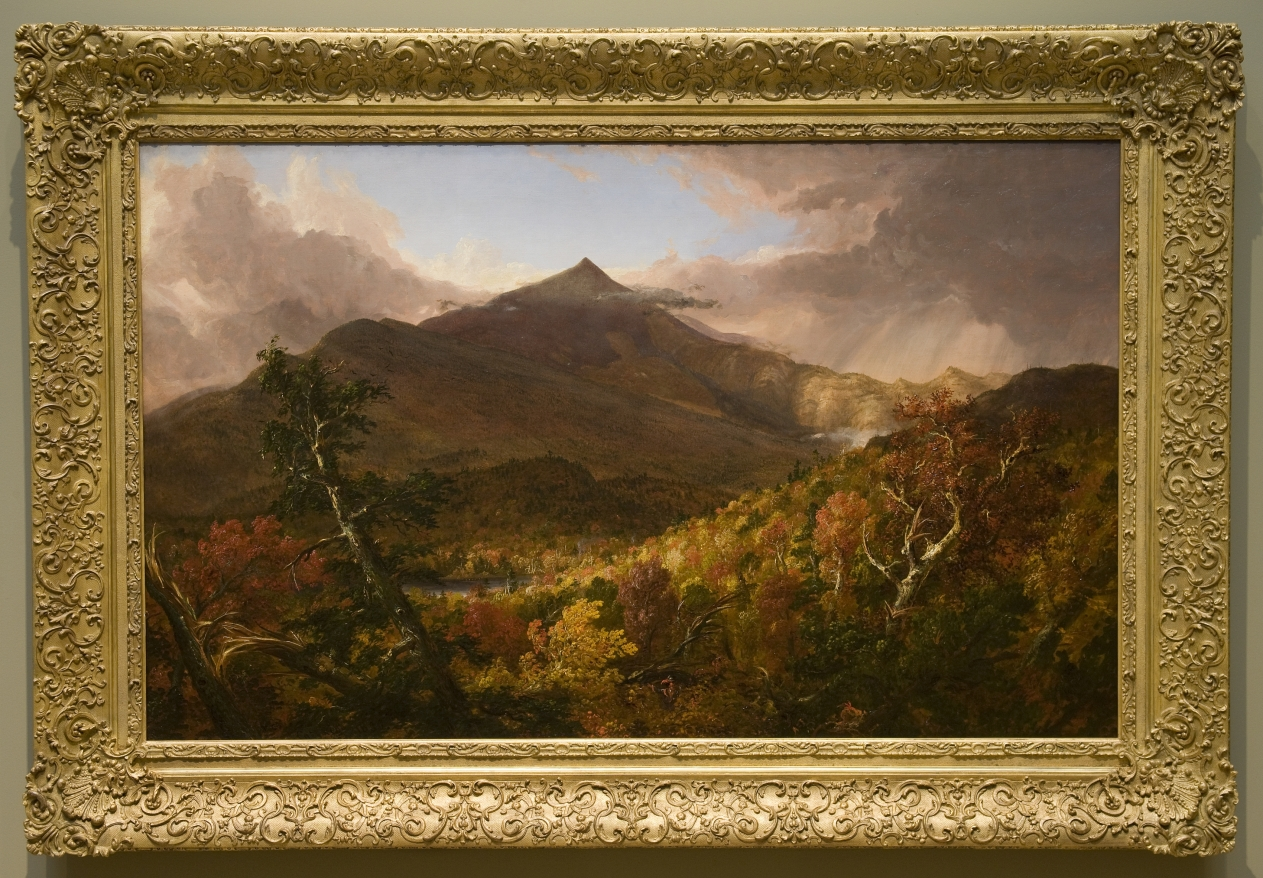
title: View of Schroon Mountain, Essex County, New York, After a Storm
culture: America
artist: Thomas Cole (American, born England,1801–1848)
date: 1838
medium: oil on canvas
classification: Painting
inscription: signed lower left: T. Cole / Catskill 1838.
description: Championing the American wilderness, Cole declared, "We are still in Eden," in his Essay on American Scenery, published two years before he painted this view of the Adirondacks. The artist sketched the scene in early summer, but when he created the painting in his studio, he rendered it in a dramatic blaze of fall colors. Such a choice likely had nationalistic overtones; he once proclaimed that autumn was "one season where the American forest surpasses all the world in gorgeousness." Cole included two Indigenous men in the painting’s right foreground foliage. At this time, the Adirondacks remained home to many Native Americans long after most had been forcibly removed from land east of the Mississippi River. While continuing to live, hunt, and fish in the area, these Algonquian and Iroquoian peoples were compelled to significantly adapt their existence amid increasing White settlement and its attendant lumber, mining, and tourist industries.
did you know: Nicknamed "Schroon Mountain" by the artist, the peak's official name is Hoffman Mountain.